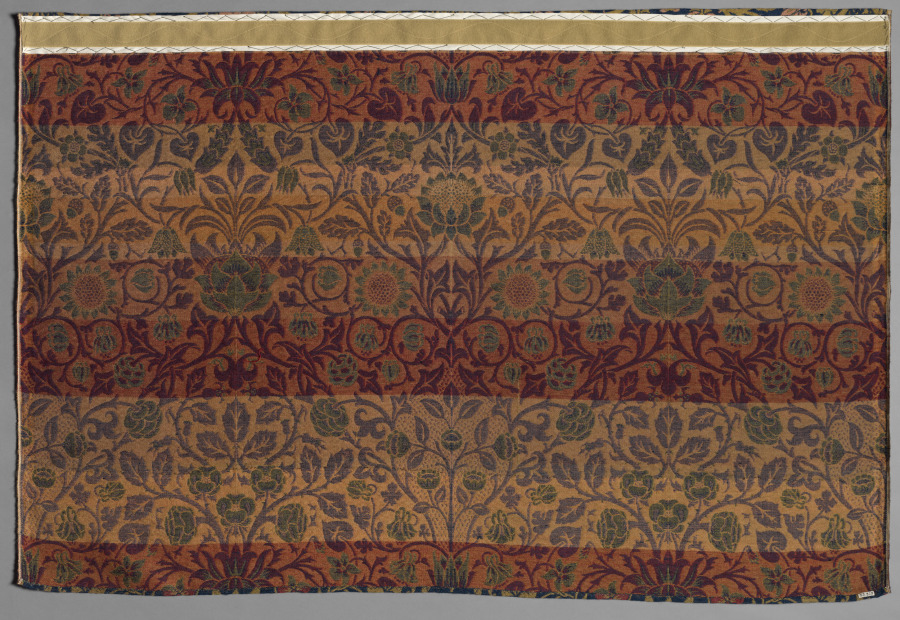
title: Violet and Columbine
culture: England, Surrey, Merton Abbey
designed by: William Morris (British, 1834–1896)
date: 1883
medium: jacquard loom woven weft-faced twill, double cloth; wool and mohair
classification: Textile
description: Morris envisioned textiles such as Violet and Columbine hanging in heavy folds, the rich colors and flowing pattern suggesting a garden wall. He strongly preferred experimenting with natural dyes instead of using the garish chemical ones that had become standard in industrialized England. Even though organic dyes were expensive and scarce, and required dyers to revive old methods, they were less likely to fade in the light or during washing, and they were capable of producing more subtle tonal effects. A sense of the process of hand-weaving can be understood by looking at the back of this textile. The warp (up and down) threads are light blue and green—visible at the bottom. The textile was woven in long lengths that could be cut at these passages of loose thread. The weft (side to side) threads in several colors, including red, pink, yellow, and blue, are more visible from the back than the front, where they disappear into the pattern.